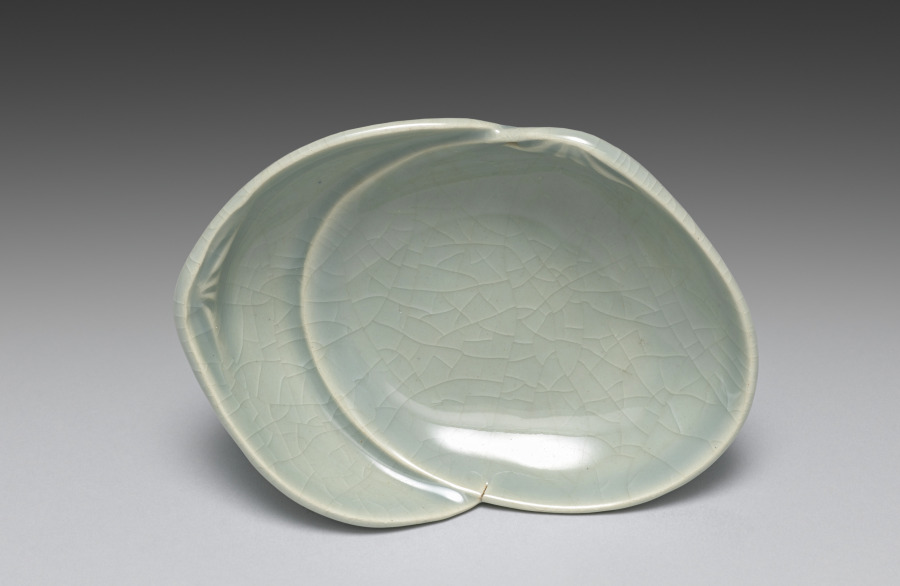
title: Dish from Saucers with Matching Shells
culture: Japan, Meiji period (1868–1912)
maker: Seifū Yohei III (Japanese, 1851–1914)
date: 1893–1914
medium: Porcelain with molded design and green crackled glaze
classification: Ceramic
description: Yohei III’s main output for his sophisticated clientele was in the form of tea sets and dining sets. He created a range of dishes in green glazes. He often produced in pairs, sets of five, or sets of ten. The set of five dishes with a more complex form is described as having a “water-colored glaze” (mizuiroyū). These are shaped like clam half shells, a reference to a game in which shell halves painted with narrative scenes or a variety of motifs must be matched back together by the players. The dishes have molded details to articulate the shell forms, and the crackling across each shell adds another dimension to the surface. Each dish is set on three small feet, formed by a pinched piece of clay and attached to an unglazed area on the underside of the dish. Curiously, while four of the dishes are stamped with the artist’s mark, one has instead a signature carved into the base.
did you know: The saucers are meant to look like matched halves of clam shells in reference to a once popular game.